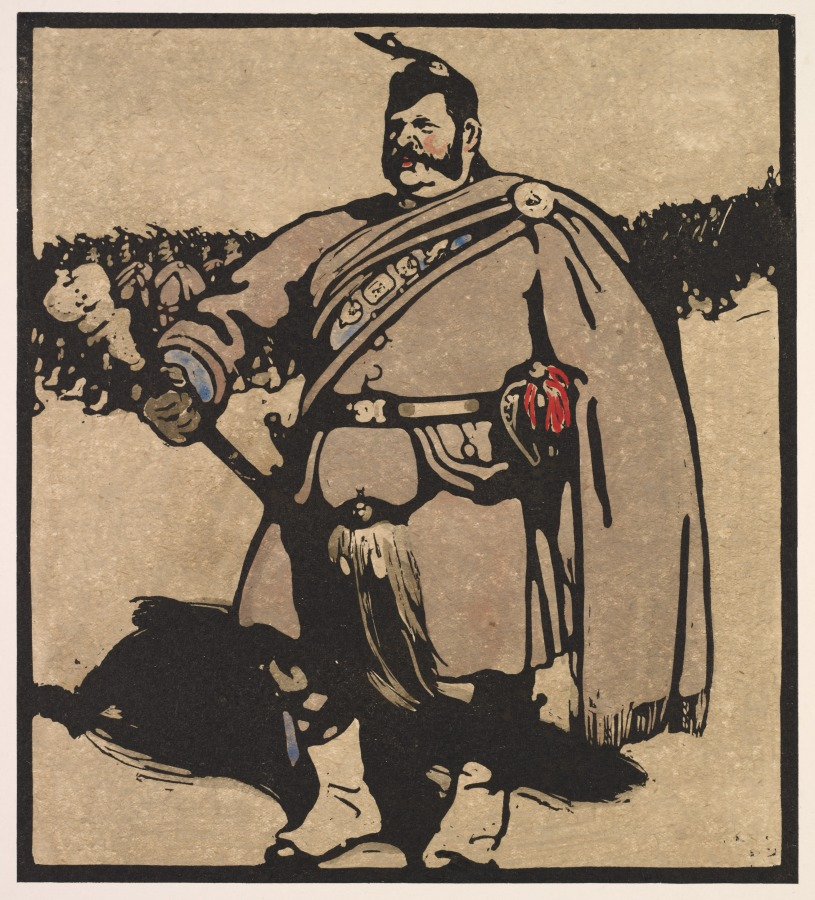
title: London Types: Drum-Major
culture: England, 19th century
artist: William Nicholson (British, 1872–1949)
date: 1898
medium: woodcut hand-colored with watercolor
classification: Print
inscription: lower left margin, in black ink: William Nicholson - 1898 -